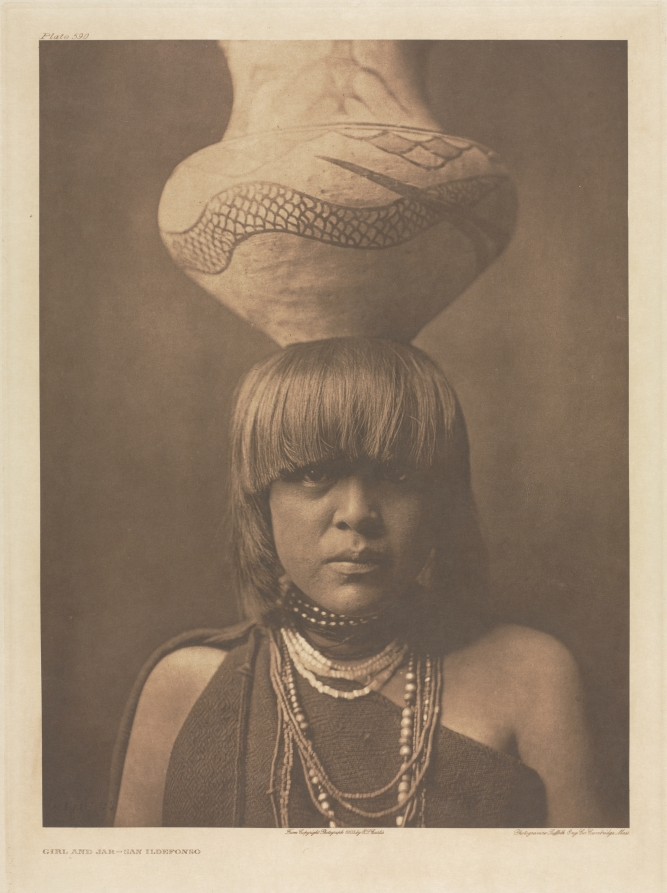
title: Portfolio XVII, Plate 590: Girl and Jar - San Ildefonso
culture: America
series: The North American Indian: being a series of Portfolios picturing and describing the Indians of the United States, the Dominion of Canada, and Alaska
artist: Edward S. Curtis (American, 1868–1952)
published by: The University Press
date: 1905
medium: photogravure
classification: Portfolio